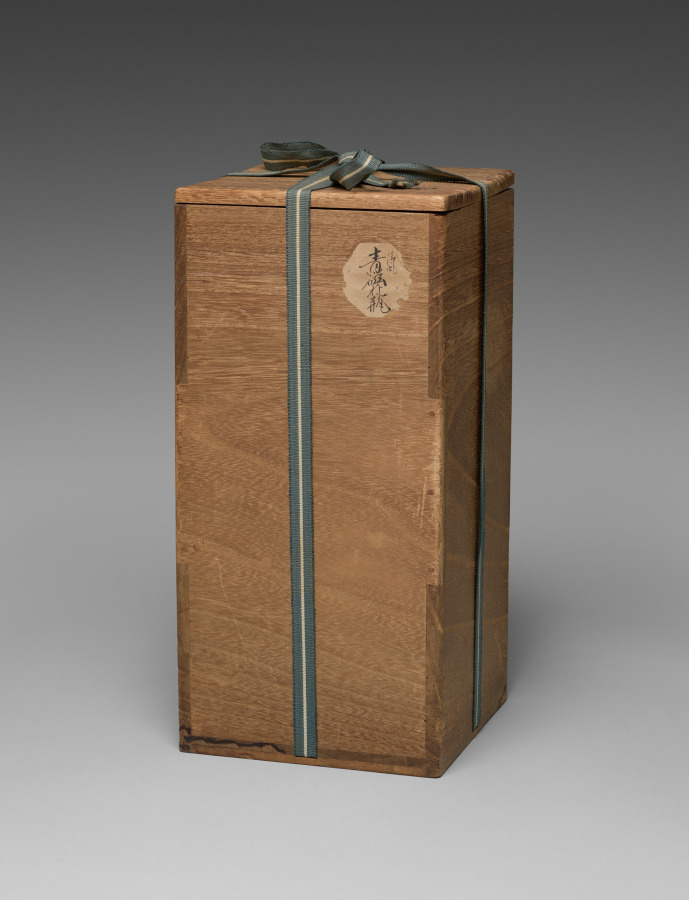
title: Flower Vase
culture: Japan, Meiji period (1868–1912)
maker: Seifū Yohei III (Japanese, 1851–1914)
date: 1912–14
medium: Porecelain with green glaze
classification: Ceramic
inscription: The vase's box lid identifies the vase as hisokuyō (C. mise yao 秘色窯), or “mysterious color ware,” style.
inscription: 清風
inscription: 清風制之 【印】帝室技芸員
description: This flower vase has a tall, slightly flared foot and bulbous body with a slimmer neck. It is completely undecorated but for the hisoku, or “mysterious color,” glaze. Its box lid has a red seal with a flower on it, a rather unusual feature also seen on the box for the green-glazed water container that belonged to the Hosokawa family (see CMA 2022.197).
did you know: The vase's box lid identifies the glaze as hisoku 秘色 or “mysterious color.”